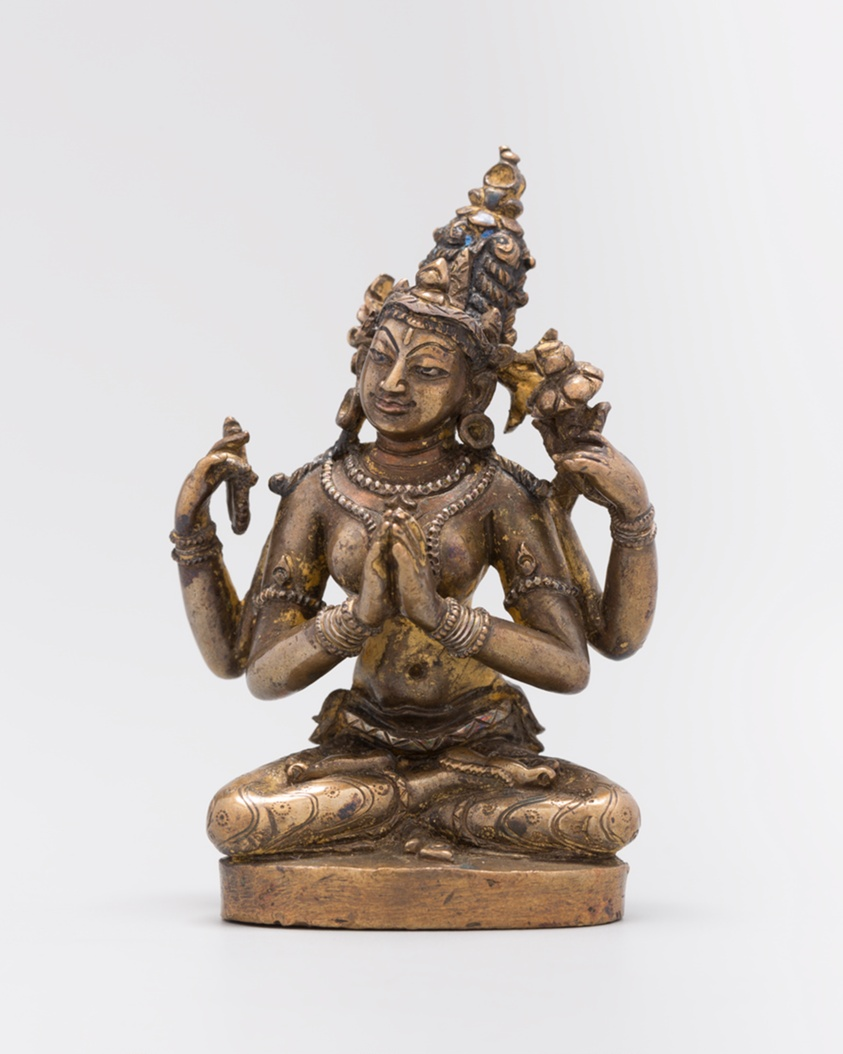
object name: Sculpture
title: Shadakshari Mahavidya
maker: India; Bihar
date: Pala period, 12th century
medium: Gilt bronze with silver and copper inlay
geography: Bihar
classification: bronze; metal; sculpture; asian art